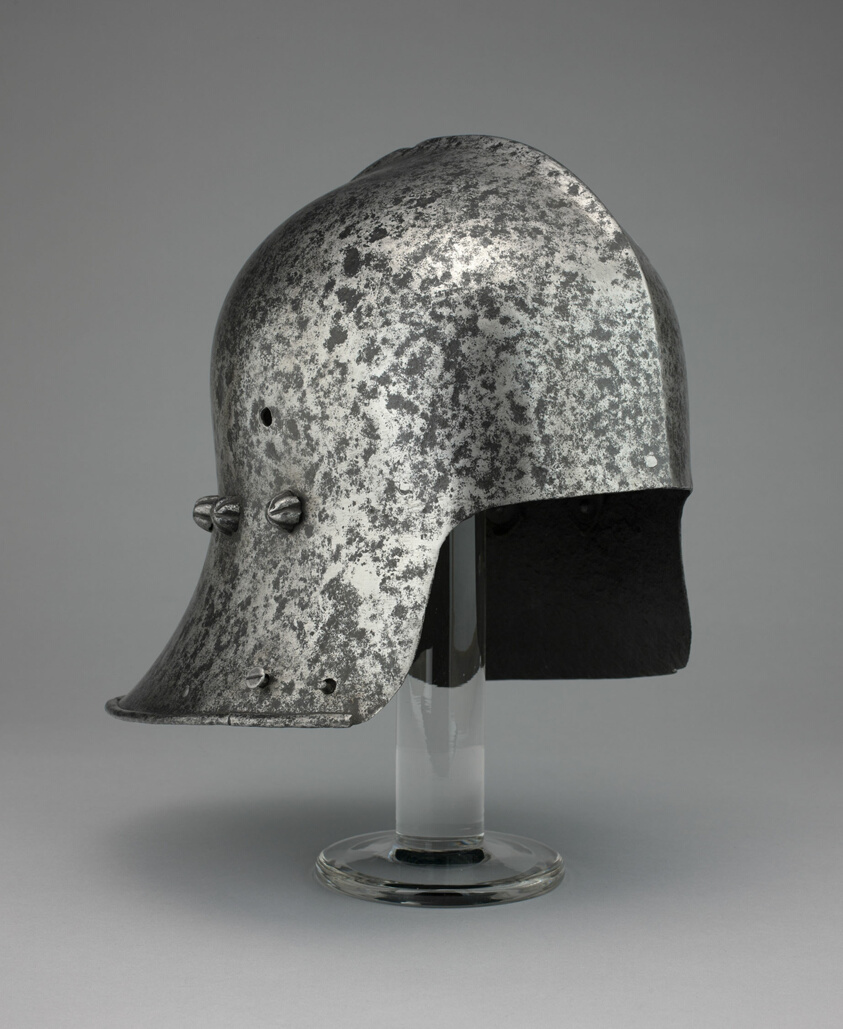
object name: Armor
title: Sallet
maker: German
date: c. 1460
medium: Steel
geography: Germany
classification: suit-helmet; armor; arms and armor